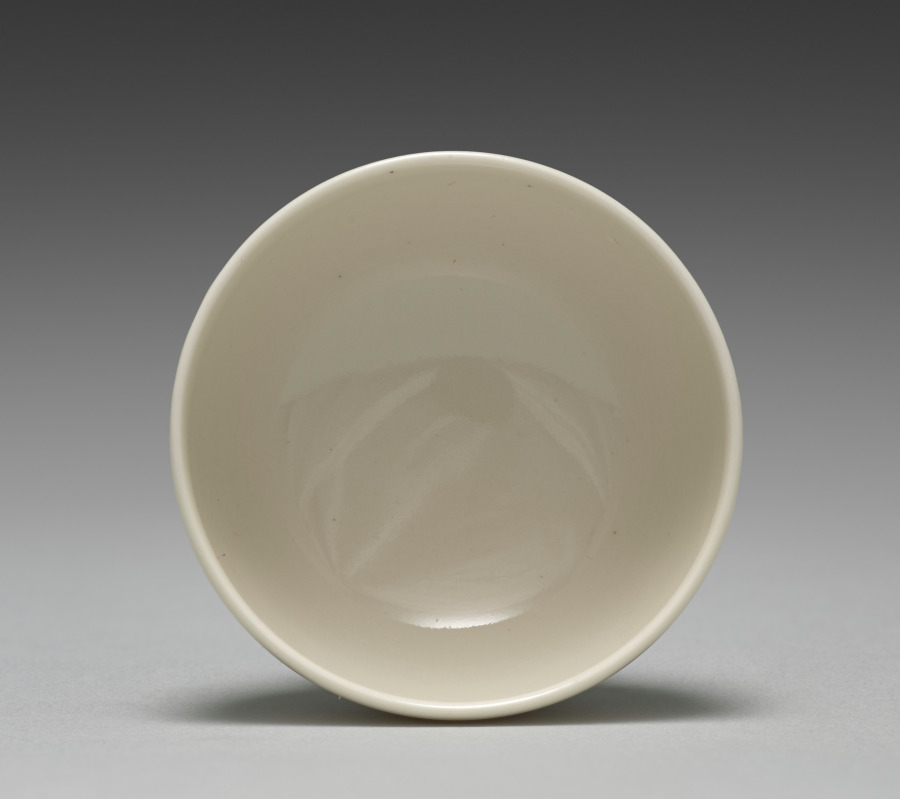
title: Sake Cup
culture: Japan, Meiji period (1868–1912)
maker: Seifū Yohei III (Japanese, 1851–1914)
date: c. 1893–1914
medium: porcelain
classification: Ceramic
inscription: 清風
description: Seifū Yohei III was the first ceramist to be designated an Imperial Household Artist, a position that came with an annuity. He was tasked with producing items need by the imperial household to decorate the Meiji Palace and to present to state guests as gifts.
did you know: There are subtle bamboo leaflike shapes on the interior of the sake cup.